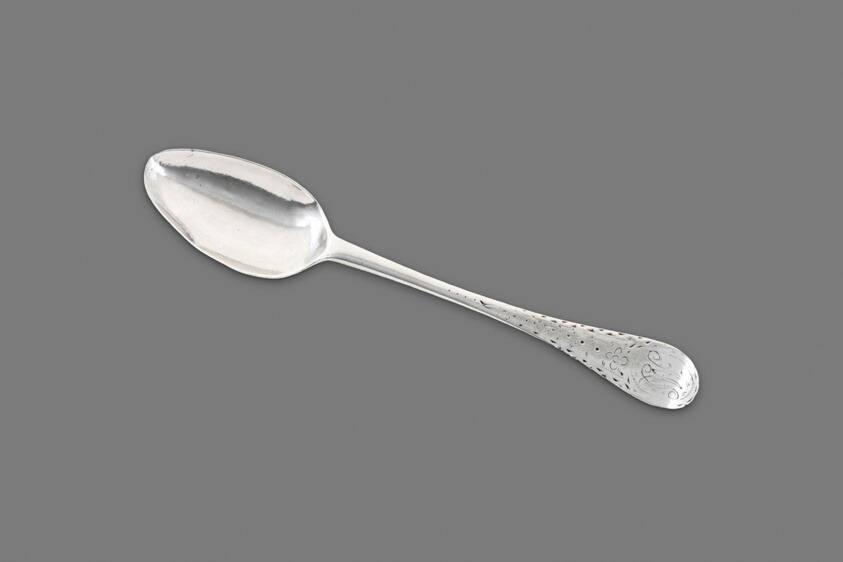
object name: Metalwork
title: Pair of Coffee Spoons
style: 18th Century, 19th century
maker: Artist unknown (American, 18th–19th century)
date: 1790–1812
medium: Silver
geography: United States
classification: spoon; silver; utensil; american decorative arts; american arts; decorative arts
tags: spoon, eating, dining